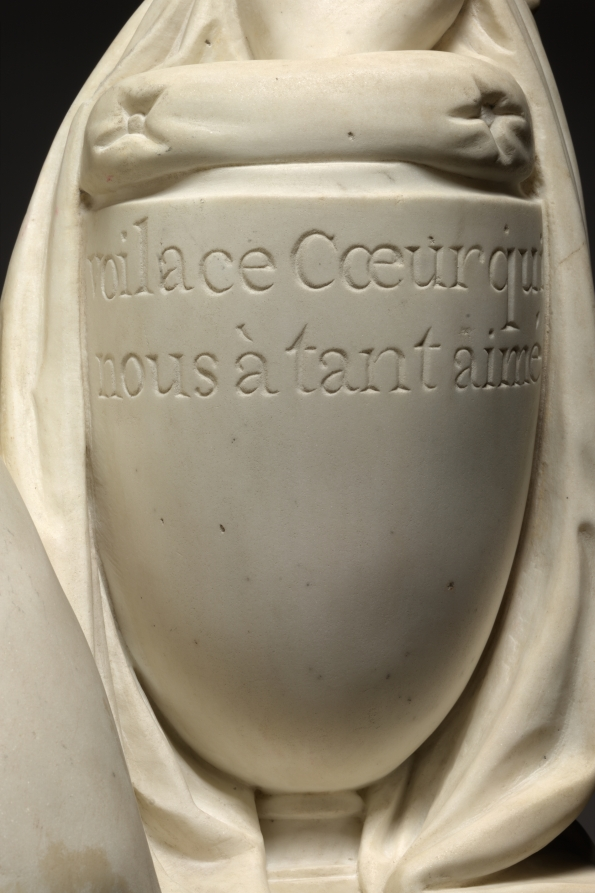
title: Funerary Monument for the Marquis de Tourney (for the Chapel of the Château de la Falaise)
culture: France, Paris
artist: François-Nicolas Delaistre (French, 1746–1832)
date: 1787–1793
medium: marble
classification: Sculpture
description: The Marquis Gallyot de Tourney commissioned this sculpture to serve as his funeral monument. It depicts a young woman gesturing with one hand toward an urn bearing the inscription Voilà ce coeur qui nous a tant aimé (Here is the heart that loved us so). The marquis specified that the figure should be a rosière, a virtuous woman of humble circumstances, a choice likely informed by the writings of Enlightenment philosophers, especially Jean-Jacques Rousseau, who championed greater social equality and democratic reform.